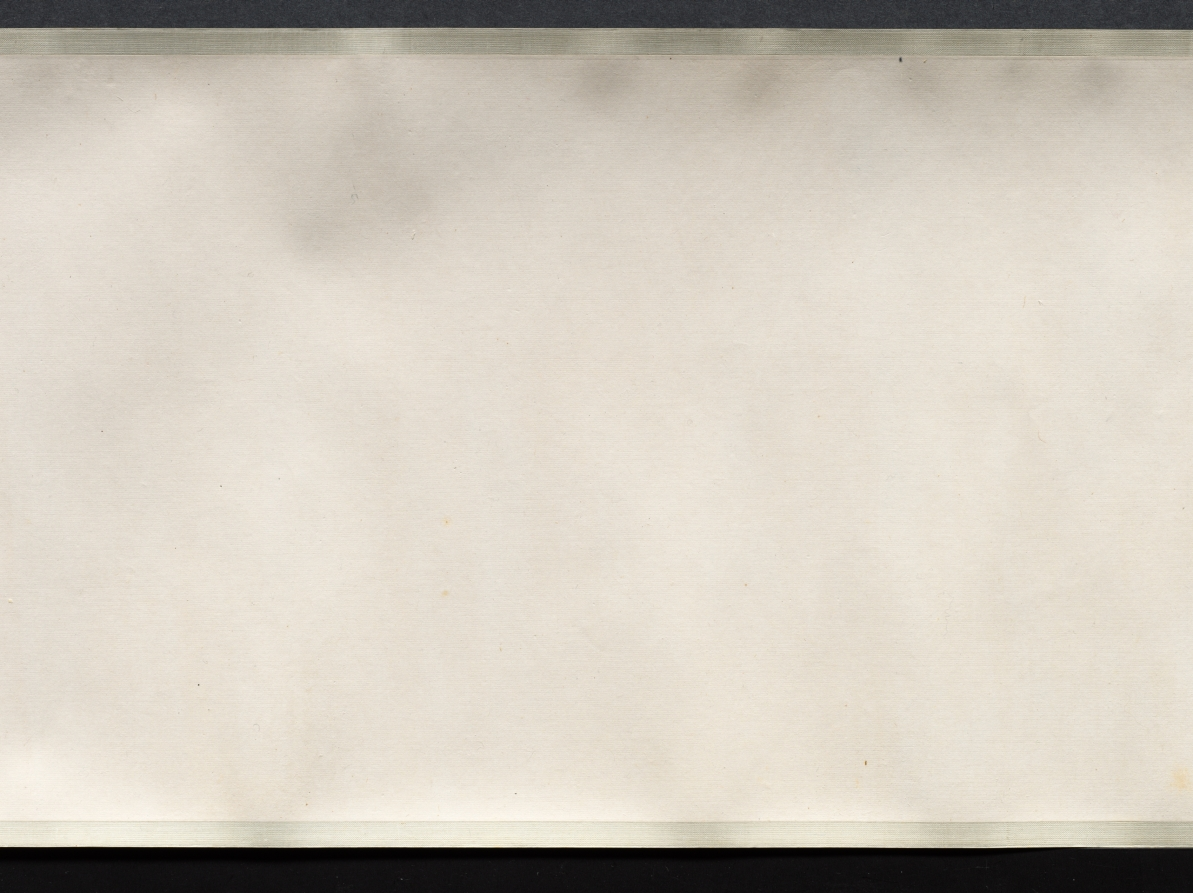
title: Autumn Mist in the Countryside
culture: China, Qing dynasty (1644-1911)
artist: Zou Zhe (Chinese, c. 1610-before 1688)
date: 1647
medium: handscroll, ink and color on paper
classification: Painting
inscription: Artist's inscription, signature, and seal: The first day of the sixth lunar month, the ting-hai year [1647], Tsou Che painted [this]. [seal] Fang-lu.